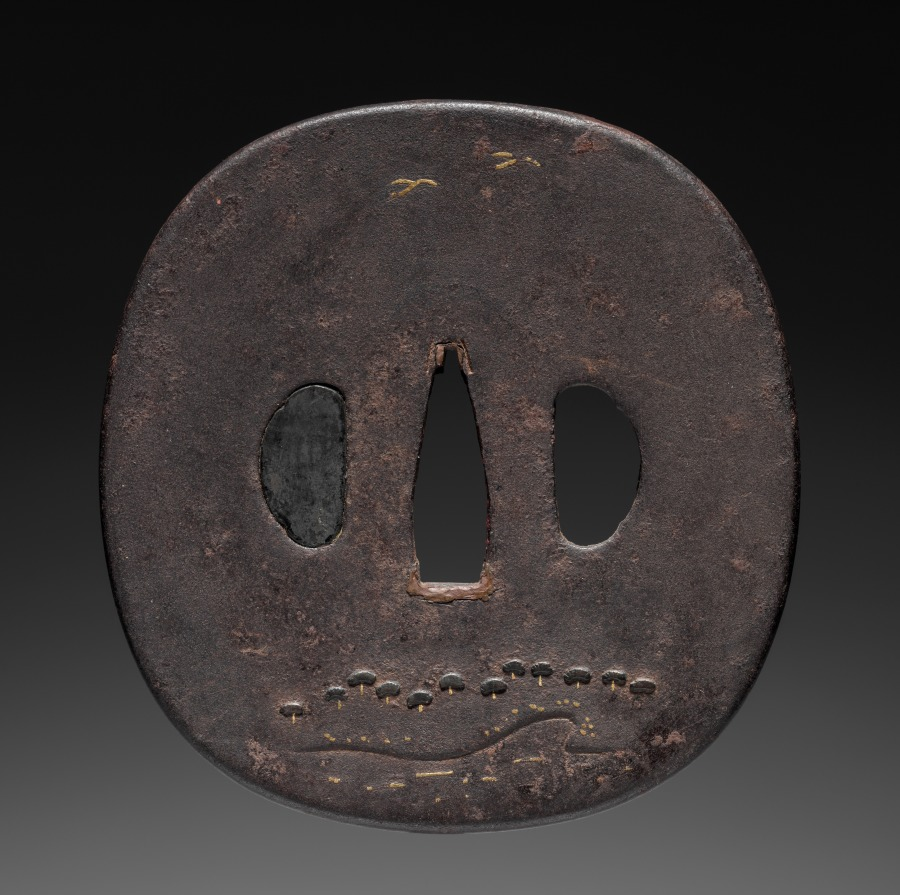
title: Sword Guard (Tsuba)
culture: Japan, Edo period (1615–1868)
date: early 1800s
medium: iron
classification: Arms and Armor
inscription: Signature: 正阿弥